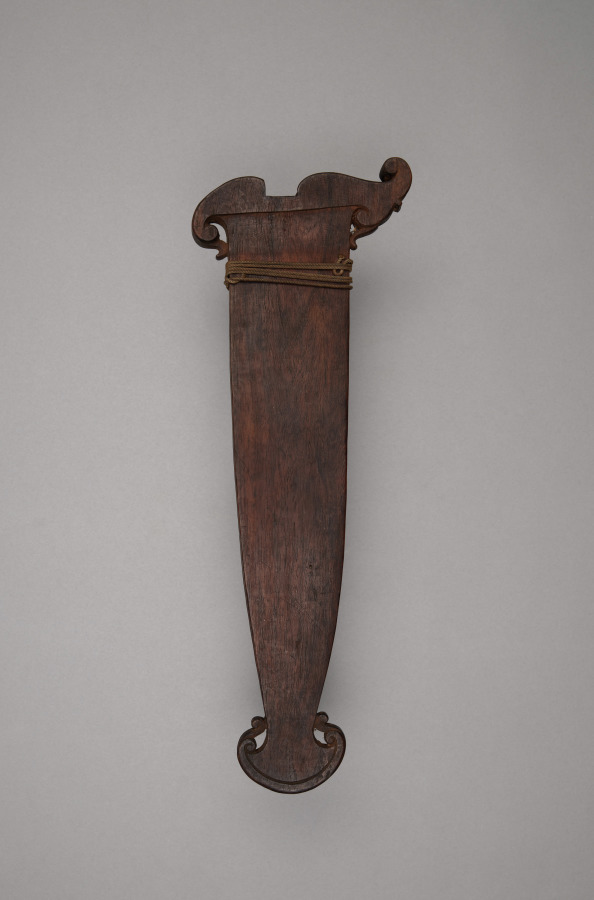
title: Scabbard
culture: Philippines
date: 1800s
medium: Wood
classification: Arms and Armor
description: This scabbard is made from two hardwood pieces, fitted together to hold a barong’s leaf-shaped blade. The rounded tip is minimally ornamented, without the okir scrolls or carved volutes applied to prestige examples. A fiber cord binding secures the upper section and reinforces the join.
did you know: This scabbard is made from dense but lightweight redwood.